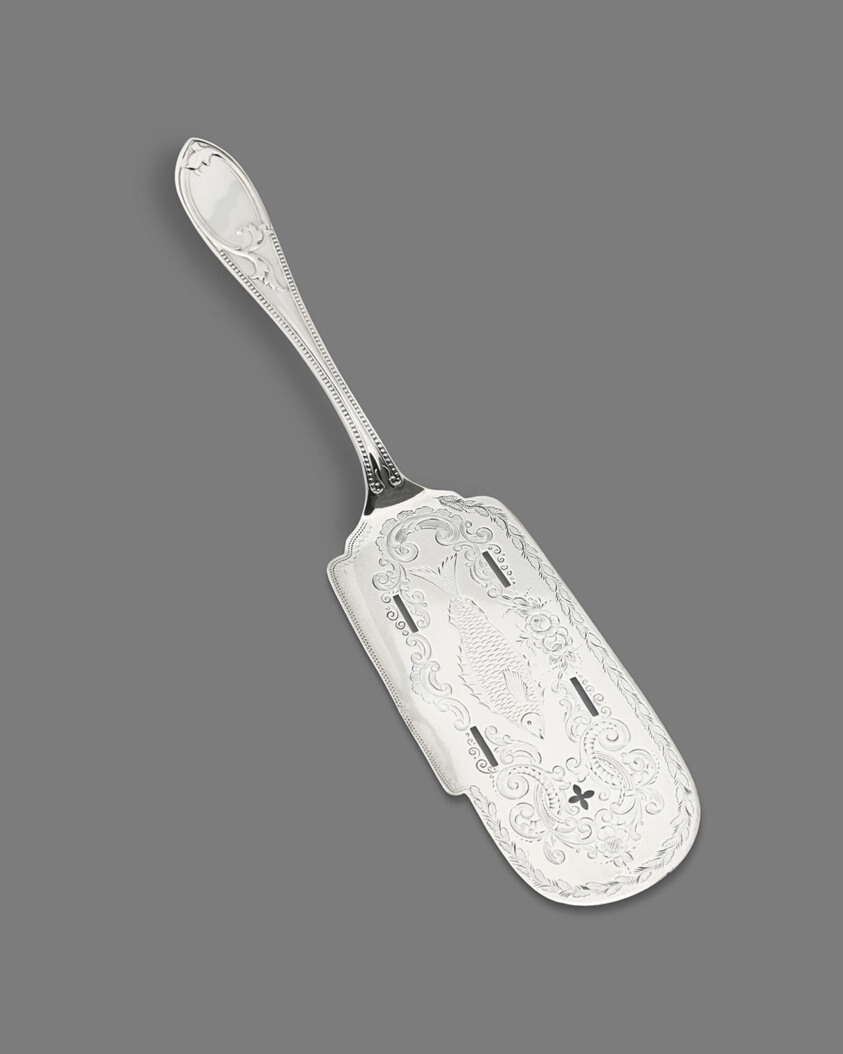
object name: Metalwork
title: Fish Slice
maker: Newell Harding & Co.; American, 1859–1862; Haverhill, Massachusetts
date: c. 1830–60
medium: Silver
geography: Boston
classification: utensil for serving food; silver; utensil; american decorative arts; american arts; decorative arts